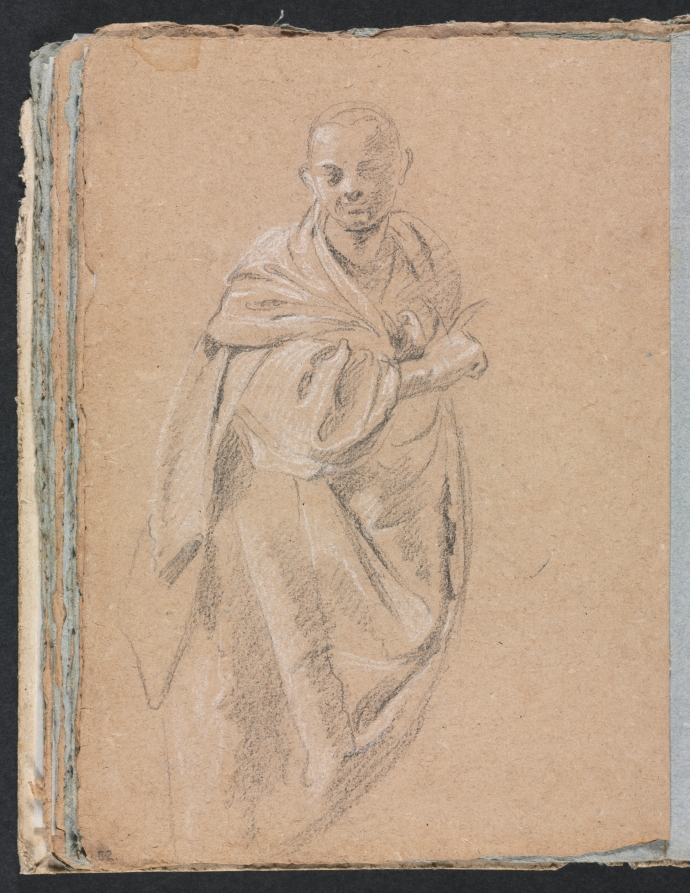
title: Verona Sketchbook: Standing monk (page 52)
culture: Italy, 18th century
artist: Francesco Lorenzi (Italian, 1723–1787)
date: 1760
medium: black chalk with white heightening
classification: Bound Volume